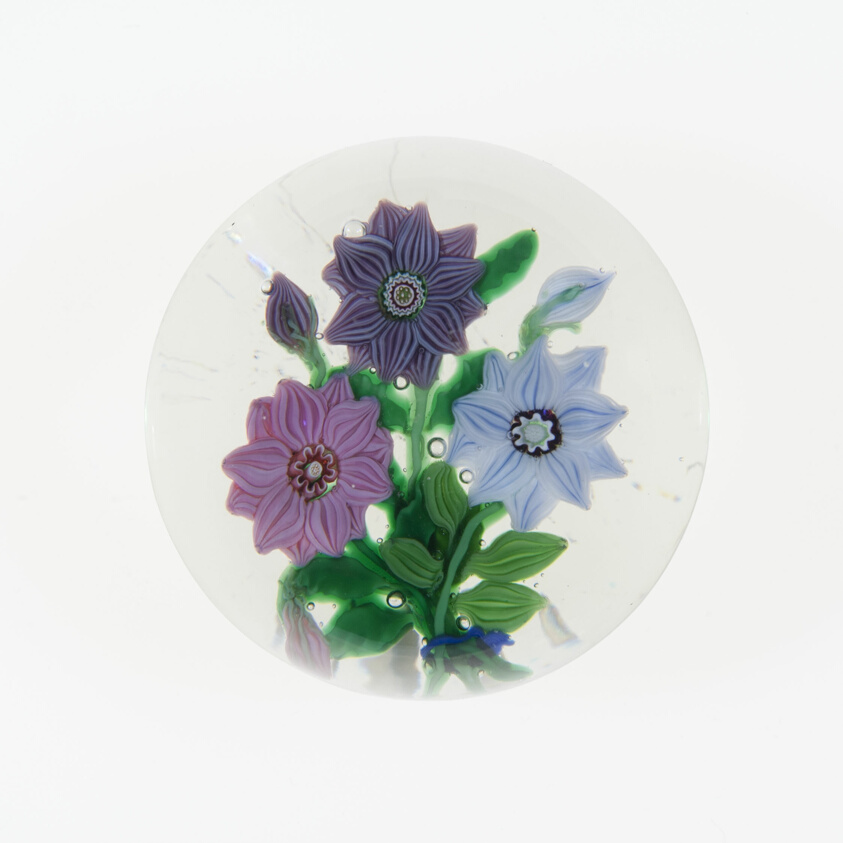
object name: Glass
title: Paperweight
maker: Clichy Glassworks (Cristalleries de Clichy); Clichy, France, 1837-1885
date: 19th century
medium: Glass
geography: Clichy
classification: paperweight; lampwork; european decorative arts; glass